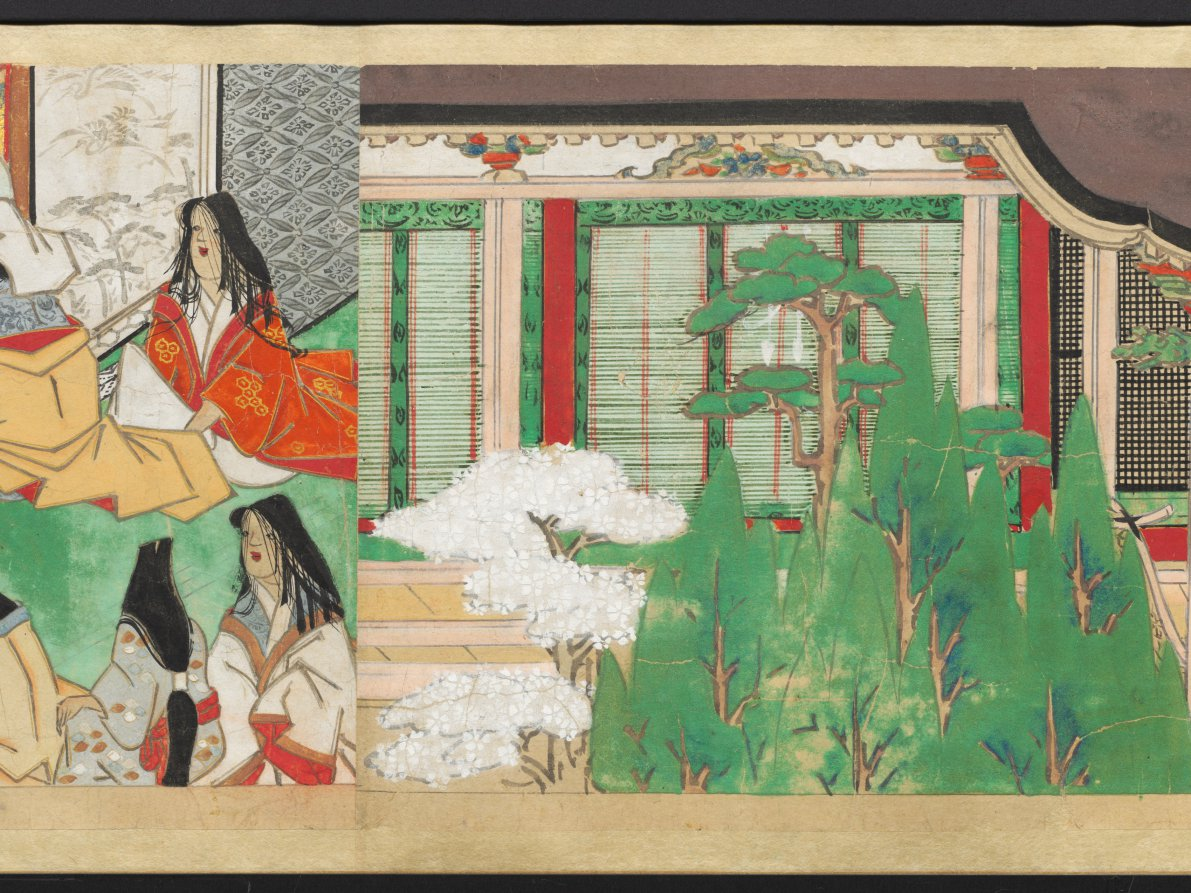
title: The Saltmaker's Story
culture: Japan, Edo period (1615–1868)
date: early 1600s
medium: One of a pair of handscrolls; ink, color, and gold on paper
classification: Painting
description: Once read and copied by girls at New Year’s celebrations and included in dowries, The Saltmaker’s Story is a rags-to-riches tale in which daughters are gifts from the gods. Despite his simple outlook, the main character progresses from humble roots as an associate at Kashima Shrine to the elite status of grandfather of the emperor through the intervention of the Kashima deity. The Saltmaker’s Story is traditionally presented in a set of three scrolls, but the text of this set has been removed by a previous owner, who remounted the illustrations as a pair. The paintings of this one take us from right to left through the first half of the tale.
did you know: This handscroll originally had texts before its paintings, but the texts were removed.